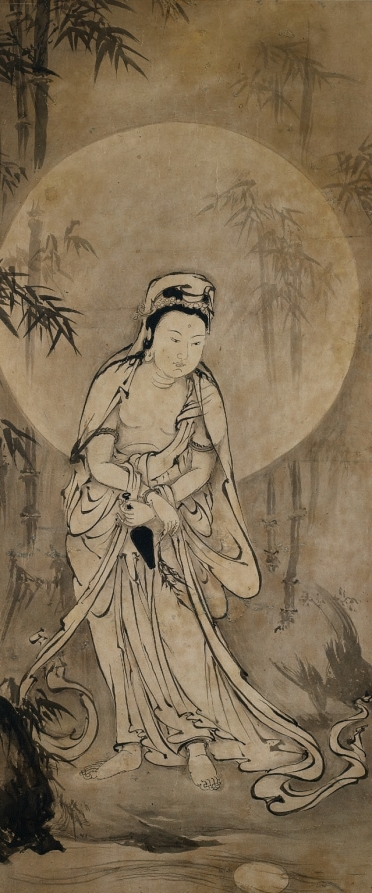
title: Willow-and-Moon Kannon (Yōryū Kannon)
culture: Japan, Muromachi period (1392–1573)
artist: attributed to Gakuō Zōkyū (Japanese, active about 1482–1514)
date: c. 1500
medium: Hanging scroll; ink on paper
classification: Painting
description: This painting of Kannon, a Buddhist deity of mercy and compassion with many forms. is attributed to Gakuō Zōkyū, a well-known Zen monk who specialized in ink painting. Kannon looks at the moon reflected in the water, a symbol of impermanence, and holds a willow branch and water vase symbolizing healing and purification.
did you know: Kannon is a bodhisattva—a being capable of enlightenment, but who delays it in order to help other beings.